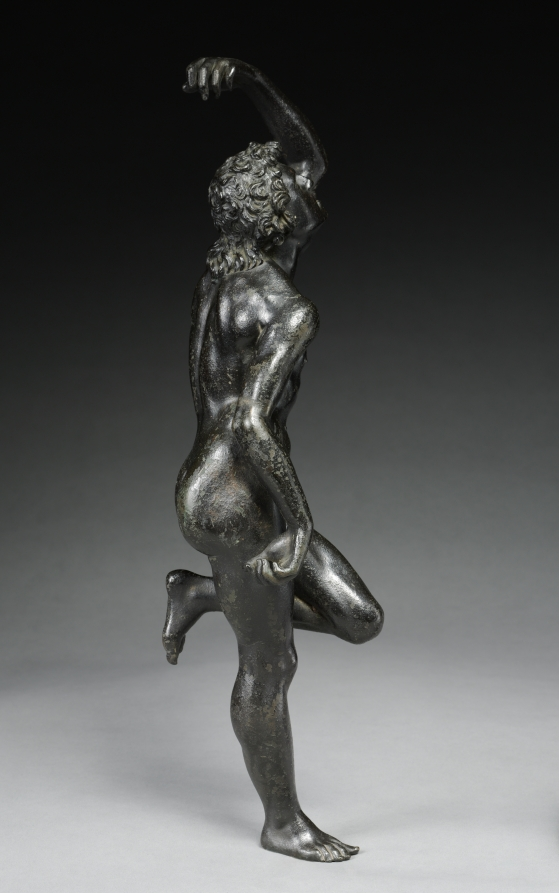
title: Saint Sebastian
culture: Germany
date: 1600s or later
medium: bronze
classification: Sculpture